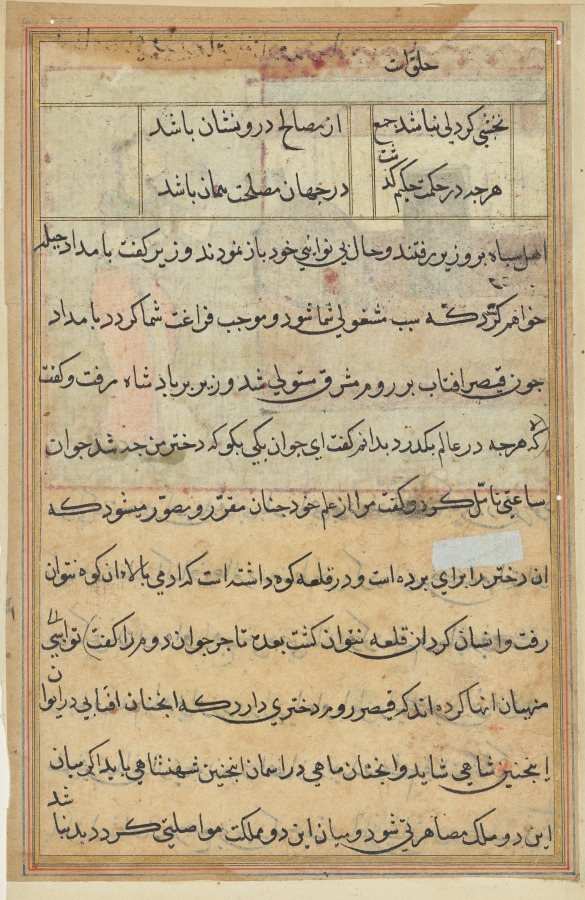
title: Page from Tales of a Parrot (Tuti-nama): text page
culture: Mughal India, court of Akbar (reigned 1556–1605)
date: c. 1560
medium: gum tempera, ink, and gold on paper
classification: Painting